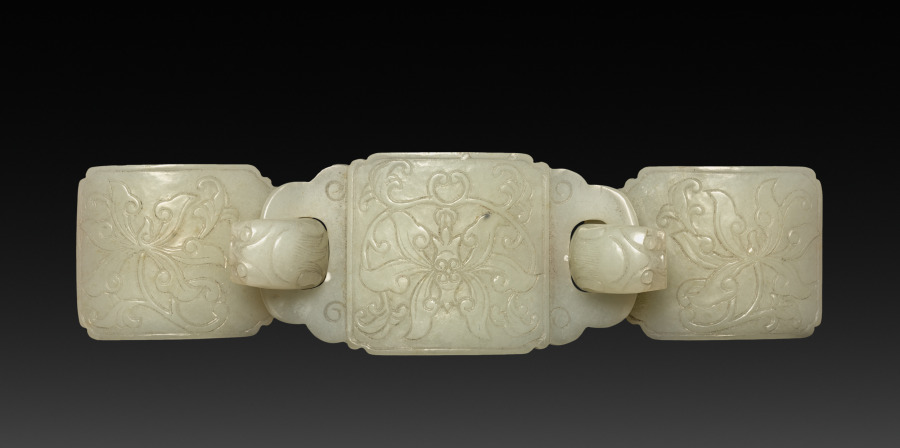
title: Buckle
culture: China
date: 1800s–1900s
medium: white jade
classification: Jewelry